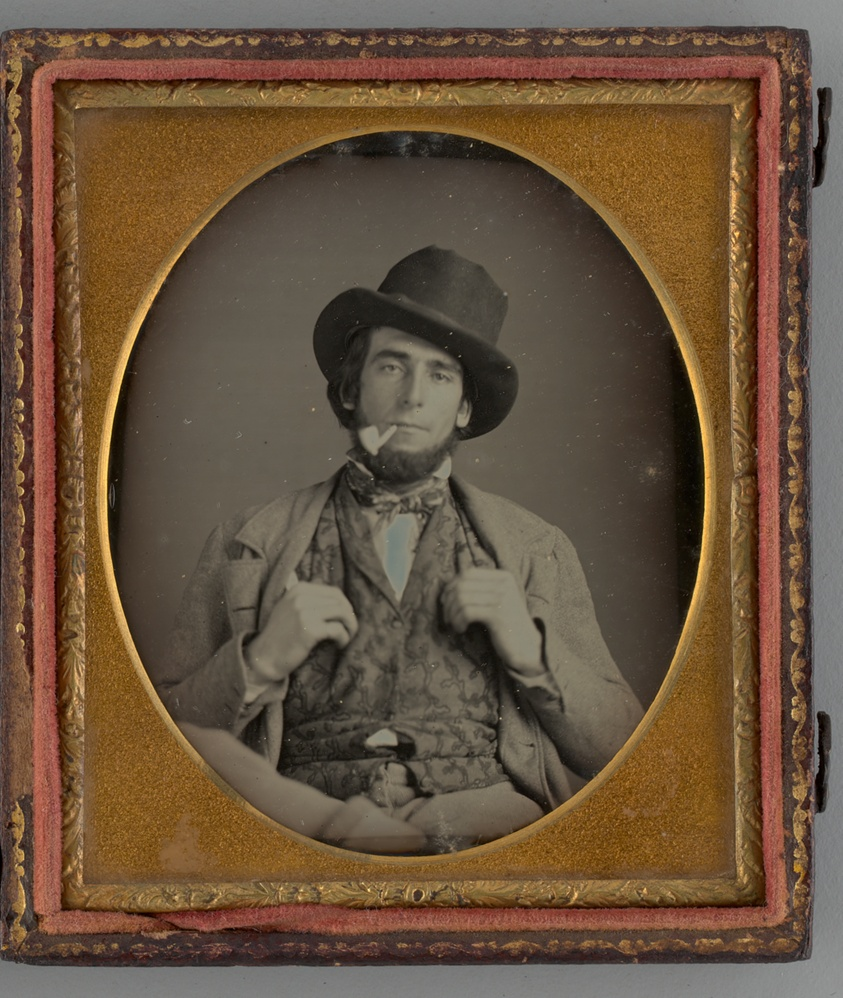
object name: Photograph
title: Untitled (Portrait of a Man with Hat and Pipe)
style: 19th century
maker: Unknown maker; American, 19th century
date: 1853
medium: Daguerreotype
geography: United States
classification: portrait; photograph; photographic process; photography; portrait; daguerreotype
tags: lundberg collection, smoking, portrait, photography, Male, hats, portraits, portraits: male subject